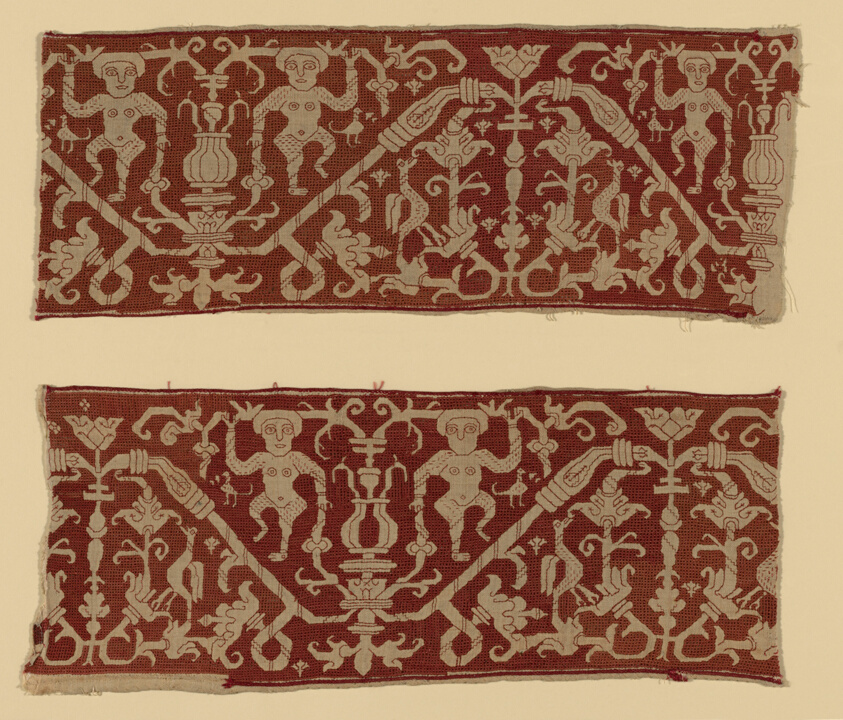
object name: Textile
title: Two Border Fragments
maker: Spain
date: Late 16th/early 17th century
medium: Linen, plain weave; pulled thread work embroidered with silk back, running and two-sided Italian cross stitches; edged with darning stitch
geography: Spain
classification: textile; needlework (visual works)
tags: cherubs, flowers, urns